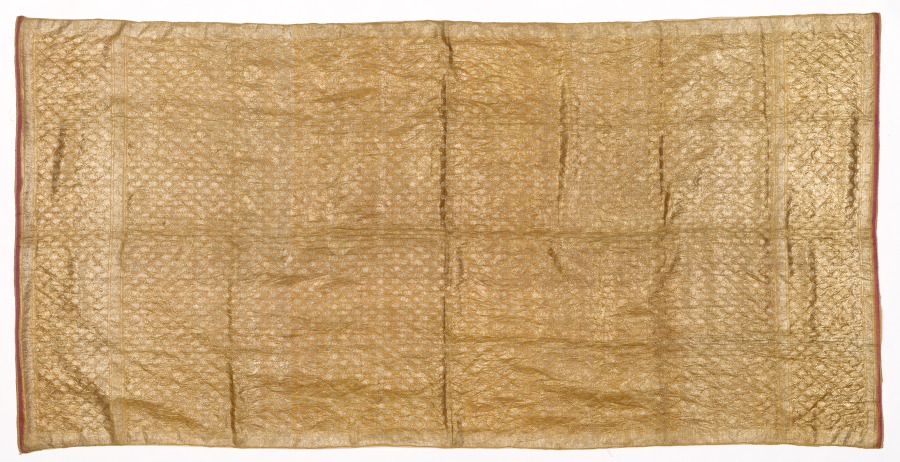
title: Sari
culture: India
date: early 1900s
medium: silk, metallic thread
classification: Textile